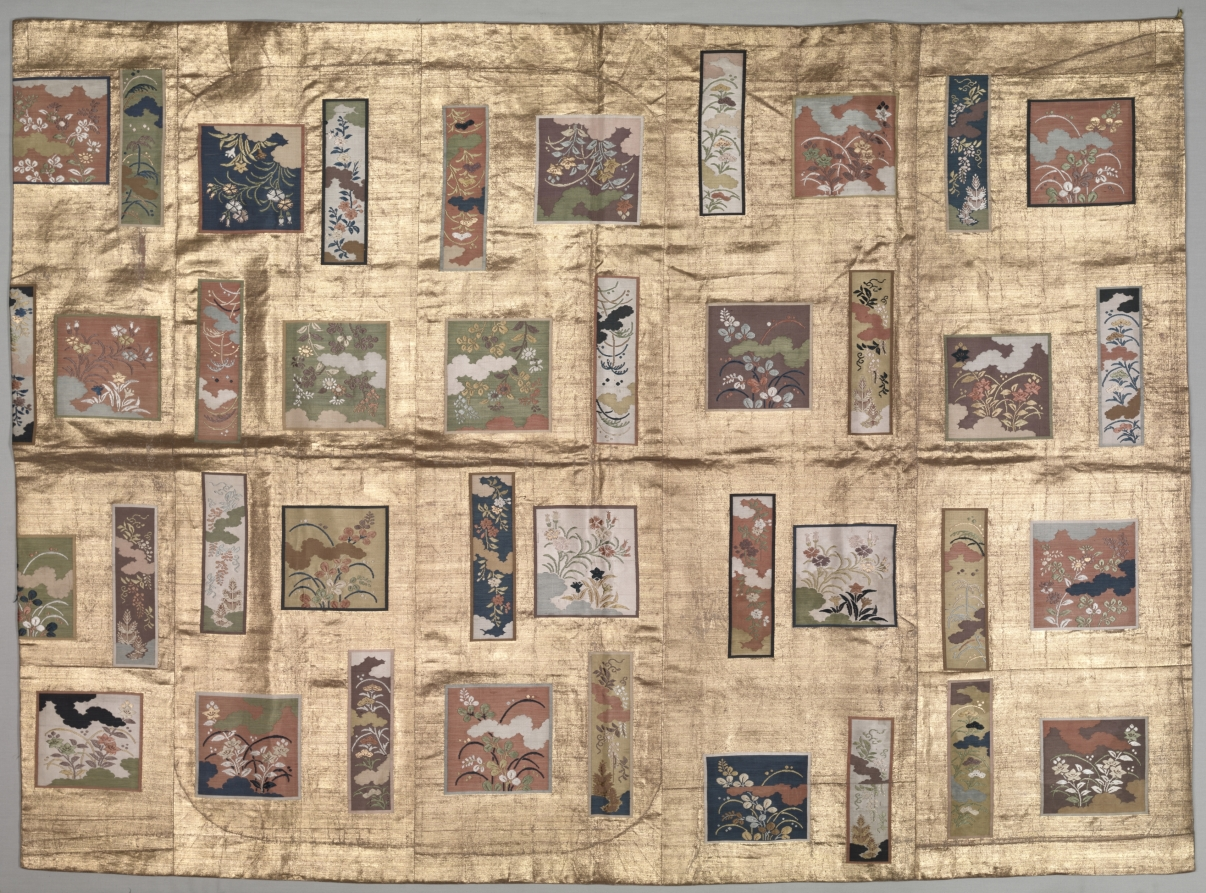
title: Buddhist Vestment (Kesa)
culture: Japan, Edo period (1615–1868)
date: 1700s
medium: silk with supplementary weft, brocaded; metal thread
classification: Garment